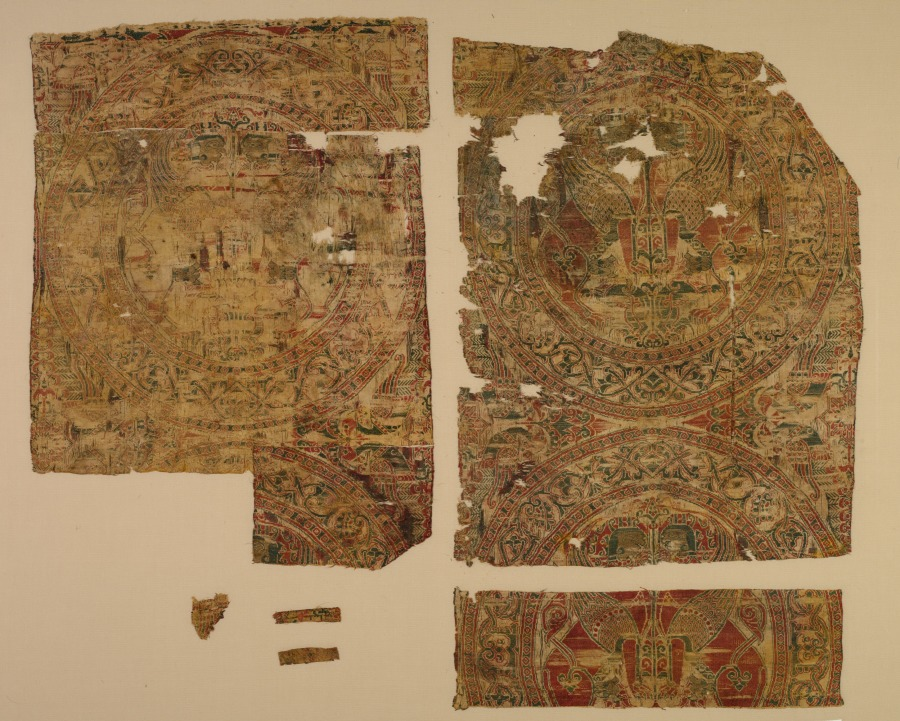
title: Fragment with confronted sphinxes in roundels from the tomb of Saint Bernard Calvo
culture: Spain, Almeria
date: 1200–43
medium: Silk and gold thread: lampas, taqueté, and plain-weave variant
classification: Textile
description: Composite creatures, such as winged lions and sphinxes, predate the rise of Islam in the Arabian Peninsula. Islamic textiles continued to include them for centuries after the Arab conquest of Spain. Pairs of lions with gold faces rear up to bite the haunches of the winged beasts. In between the roundels are pairs of peacocks, motifs traceable to pre-Islamic Persian art that spread throughout the Islamic world, including Spain. The body of Saint Bernard Calvo, the Catholic Bishop of Vich in 1233–43, was wrapped in textiles, including these fragments that still retain traces of his blood.